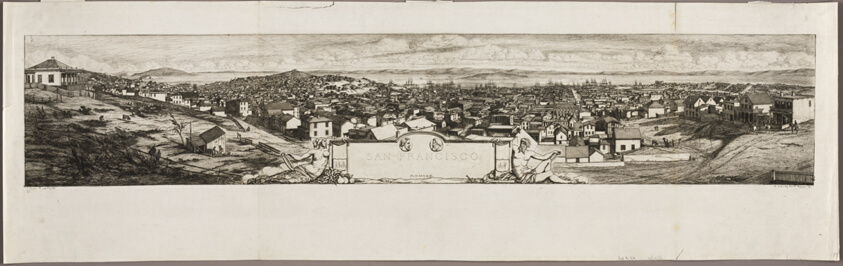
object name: Print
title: San Francisco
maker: Charles Meryon (French, 1821-1868); printed by Auguste Delâtre (French, 1822-1907)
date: 1855–56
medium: Etching and drypoint on grayish ivory paper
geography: France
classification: etching; print; prints and drawing